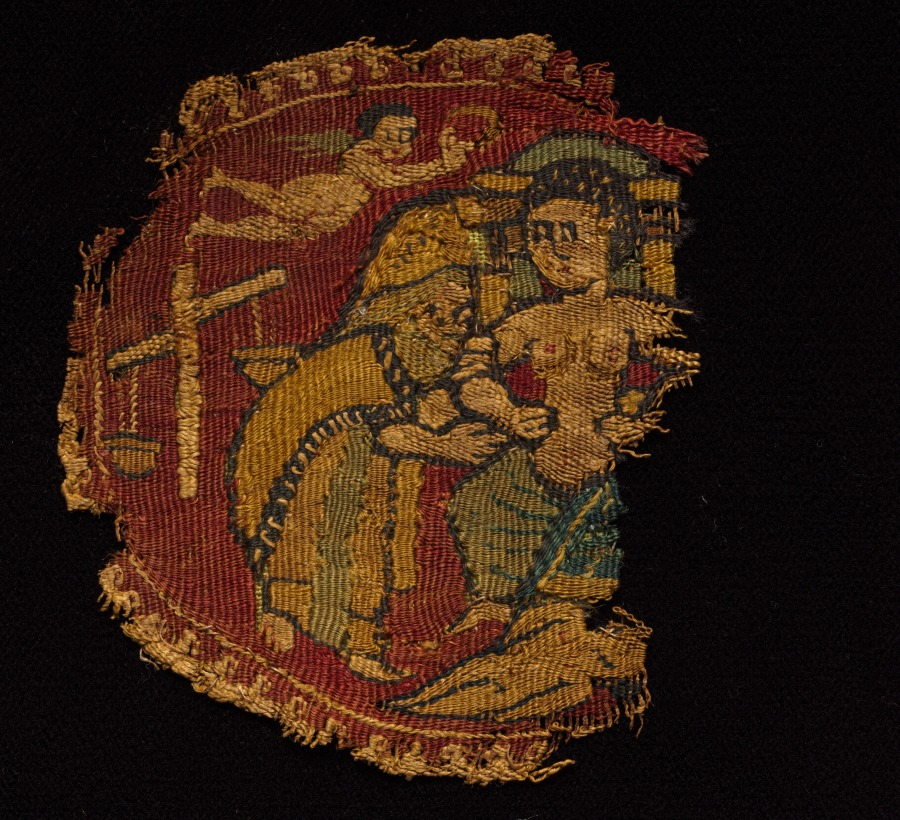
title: Four Segmenta from a Tunic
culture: Egypt, Umayyad period (661–750)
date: 650–750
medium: Wool and linen: tapestry weave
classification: Textile